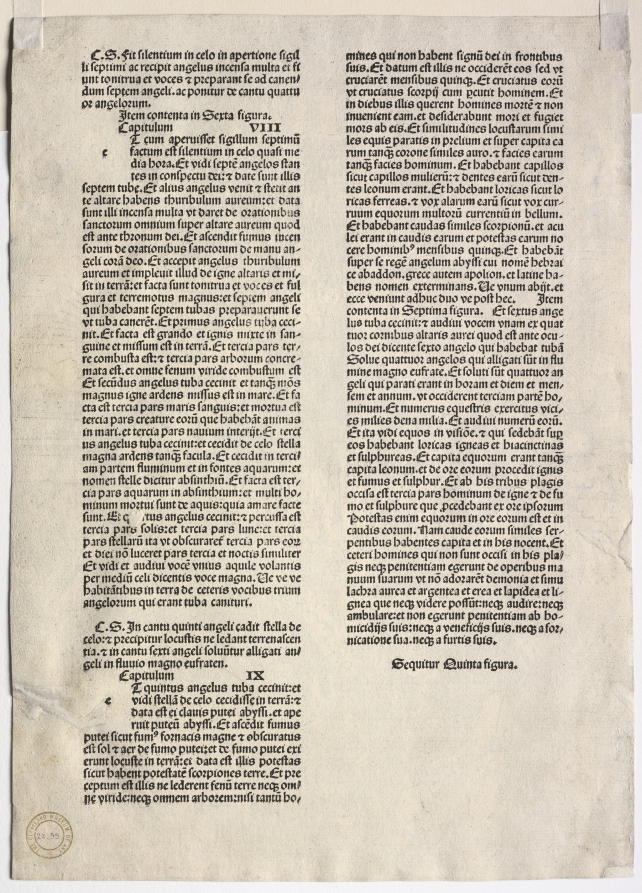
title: Revelation of St. John: Opening of the Sixth Seal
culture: Germany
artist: Albrecht Dürer (German, 1471–1528)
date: 1511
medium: woodcut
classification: Print